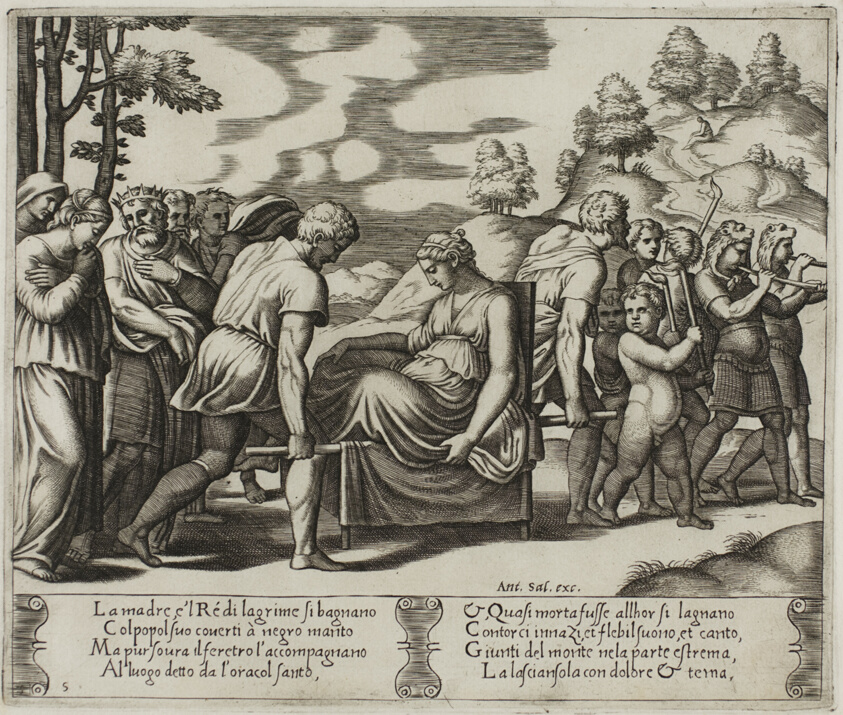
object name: Print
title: Psyche Taken... to a Deserted Mountain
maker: Master of the Die (Italian, active c. 1530-1560); after Michiel Coxcie I (Flemish, 1499-1592); in turn, inspired by Raffaello Sanzio, called Raphael (Italian, 1483-1520)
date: 1530/40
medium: Engraving in warm brown ink on cream laid paper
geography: Italy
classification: engraving; print; prints and drawing